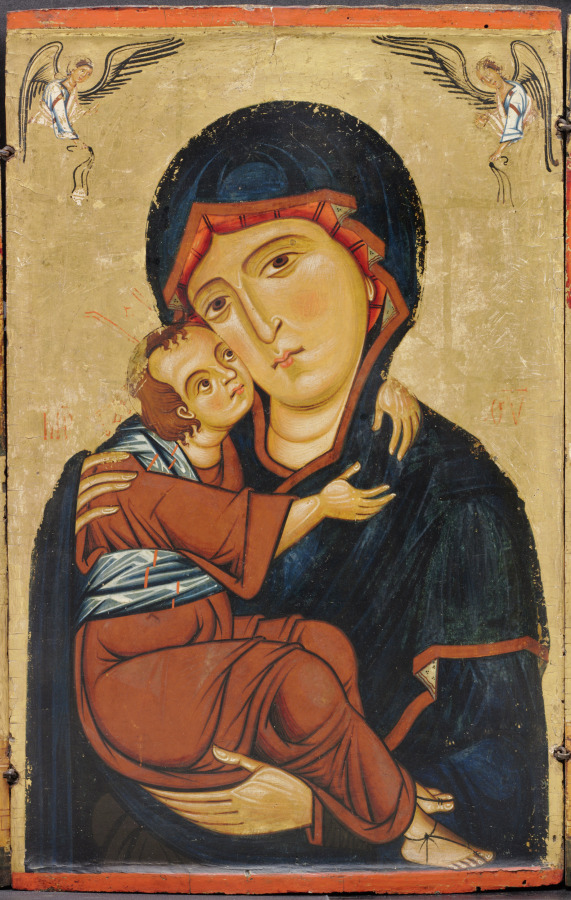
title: Virgin and Child with Saints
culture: Italy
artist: Berlinghiero (Italian, before 1242)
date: c. 1230s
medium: tempera and gold on wood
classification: Painting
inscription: MP OV.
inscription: XC IC ES NI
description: This small altarpiece, intended for a domestic interior or private chapel, consists of three panels, allowing it to be folded and easily transported. Surrounding the Virgin and Child in the center are various saints. On the left is Saint Andrew crucified, with St. Francis and St. Paul below; on the right, Christ with the instruments of the Passion, and St. Stephen and St. Lawrence below. The long expressive lines that define the clothing and hands of the figures are typical of Byzantine painting, which spread from Constantinople to Italy in the Middle Ages. Berlinghiero is one of the earliest Italian painters known by name. He lived in Lucca, the most important artistic center in Tuscany before the rise of Siena and Florence. Berlinghiero headed a large, influential workshop that included his sons.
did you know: This tabernacle was recognized as being by Berlinghiero while in the the collection of Adolphe Stoclet, a wealthy Belgian engineer and collector.